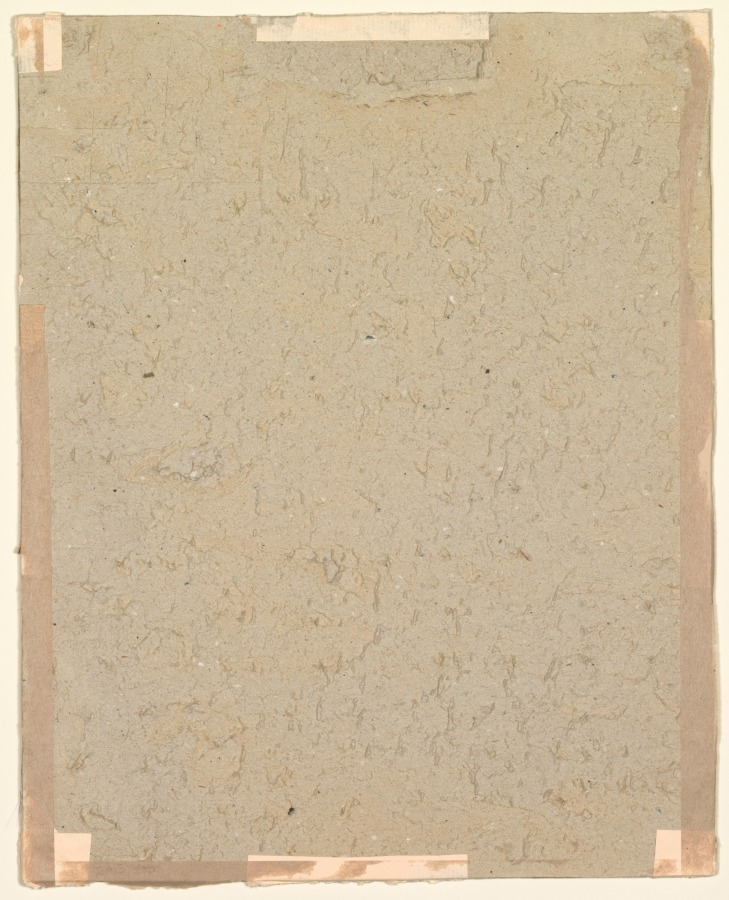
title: Women playing at cross-dressing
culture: India, Golconda, Deccan, 17th century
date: c. 1680–1700; border added 1800s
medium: ink heightened with colors on paper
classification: Painting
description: In this scene harem women act out the visit of a prince. One of them has donned a man’s royal feathered turban, and a lady affectionately offers a cup of wine as attendants stand by with two more bottles, a fan, and a rose. The master artist of an Indian painting workshop would draw the composition and make visual notations as to which colors and patterns should be used. The drawing would then be given to a colorist to paint, with final details rendered by another artist or the initial master.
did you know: Heavy eyelids give a languorous quality to paintings made in Golconda.